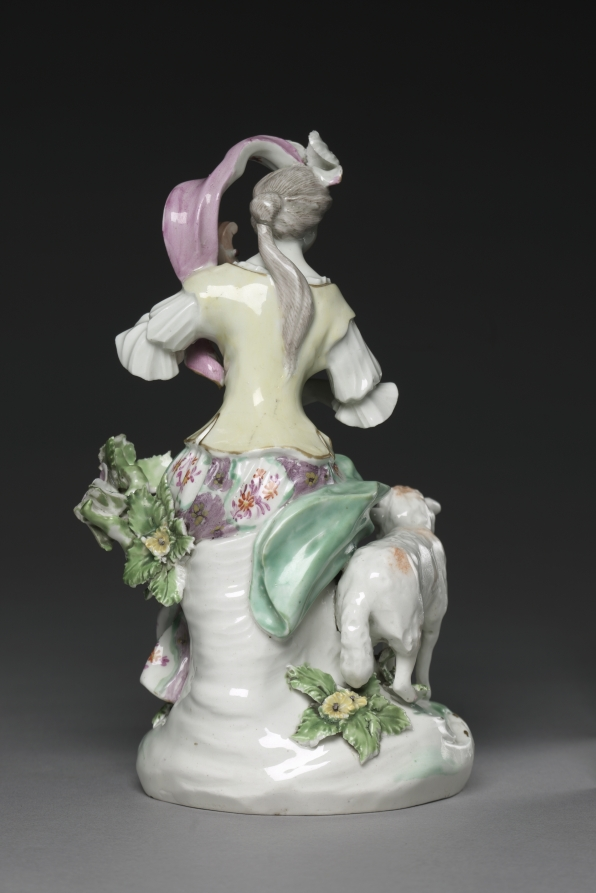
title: Seated Musician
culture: England, Derby, 18th century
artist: Derby Porcelain Factory (British)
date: c. 1765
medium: soft-paste porcelain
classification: Ceramic